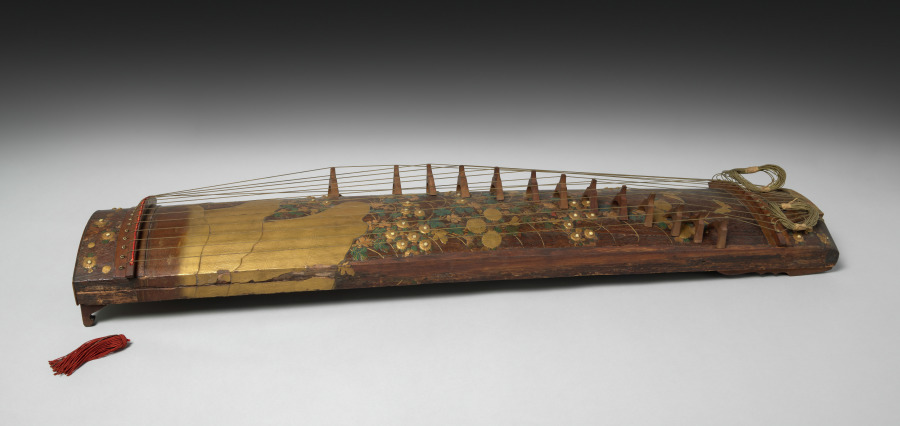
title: Koto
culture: Japan, Edo period (1615–1868)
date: early to mid-1800s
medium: Wood with colored lacquer, sprinkled gold powder (maki-e), glass, textile and cord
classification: Musical Instrument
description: This koto has an elaborately decorated surface, suggesting that it was meant to be admired as a decorative object rather than played as a musical instrument. The vertical design shows a profusion of chrysanthemum and miscanthus grass above a brushwood fence as well as a pair of butterflies.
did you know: The koto descended from the guzheng, a Chinese zither first imported to Japan in the seventh century.